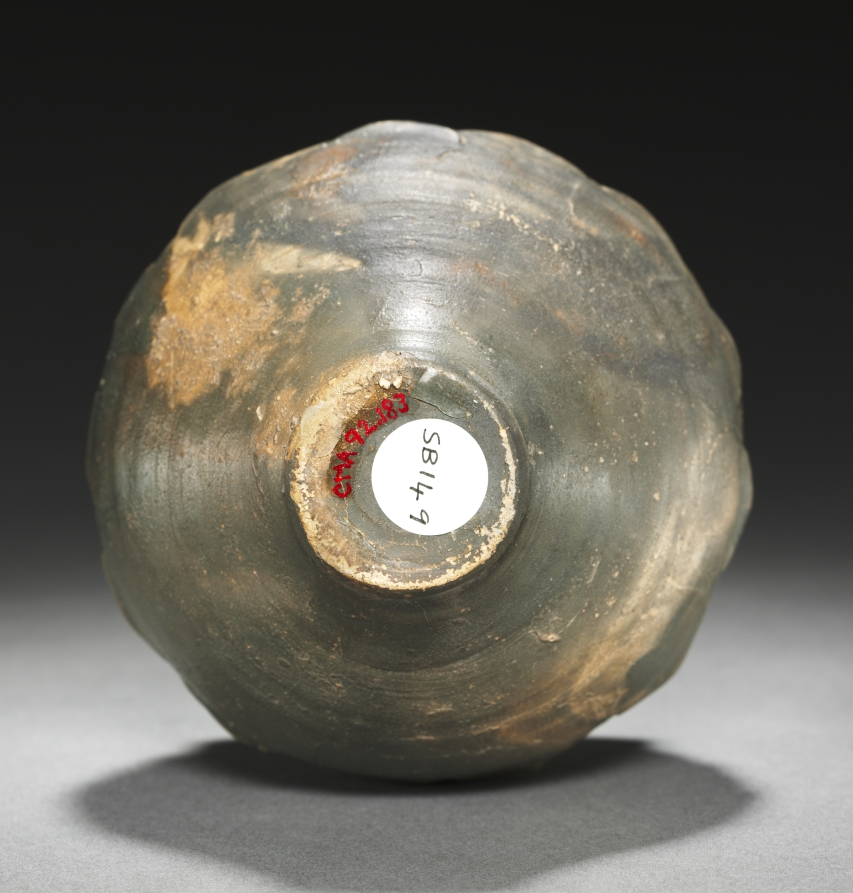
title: Beaker with Scale Pattern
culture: Rhenish (Cologne), Gallo-Roman, 1st Century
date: 1–100 CE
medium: reddish ware with dark gray burnished slip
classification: Ceramic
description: The dark brown glaze on the exterior of this beaker is patchy and irregular, allowing the light red clay beneath to show through. The glaze is especially light on the ridges of the raised scales that decorate the upper body of the vessel, arranged in four offset rows. The pattern was created by applying thick clay slip to the surface of the beaker after it was removed from the potter’s wheel.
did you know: Several textile fibers were found inside this beaker, suggesting that it may have contained an object or objects wrapped in cloth when it was buried.